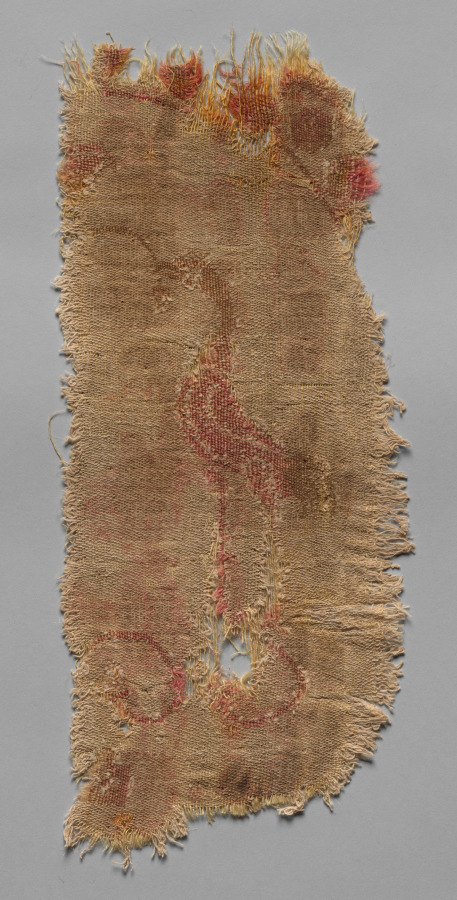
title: Fragment of Large Scale Roundel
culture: Iran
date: 600s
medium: compound twill; wool and cotton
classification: Textile